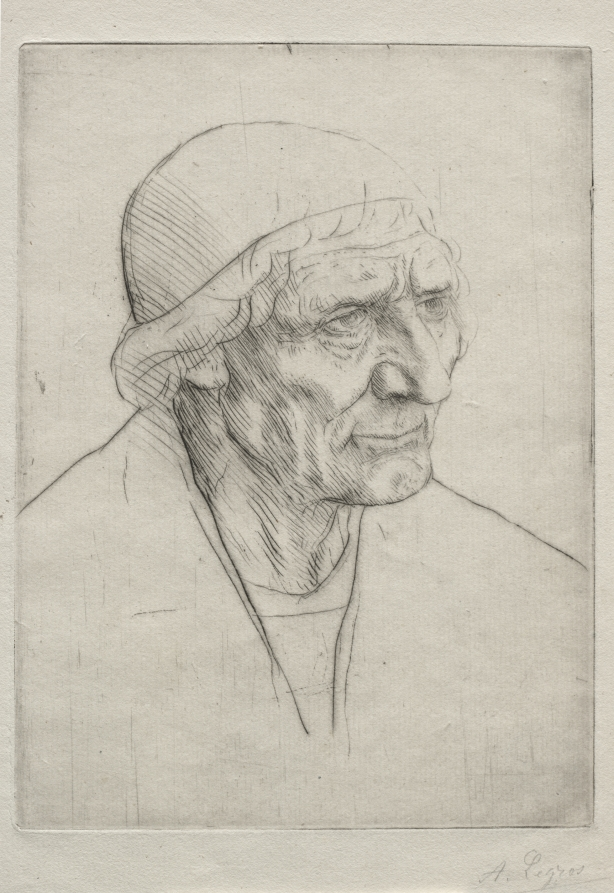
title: Tête de Bénédiction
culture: France, 19th-20th century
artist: Alphonse Legros (French, 1837–1911)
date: c. 1875–1900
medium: etching and drypoint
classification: Print